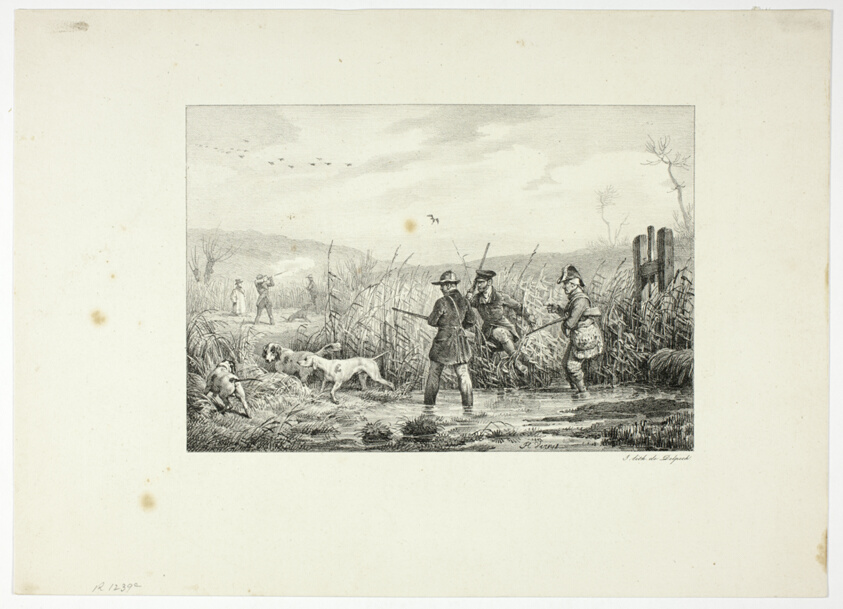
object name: Print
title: Hunters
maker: Horace Vernet (French, 1789-1863); printed by Francois Seraphin Delpech (French, 1778-1825)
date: 1813–39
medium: Lithograph in black on ivory wove paper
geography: France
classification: lithograph; print; prints and drawing